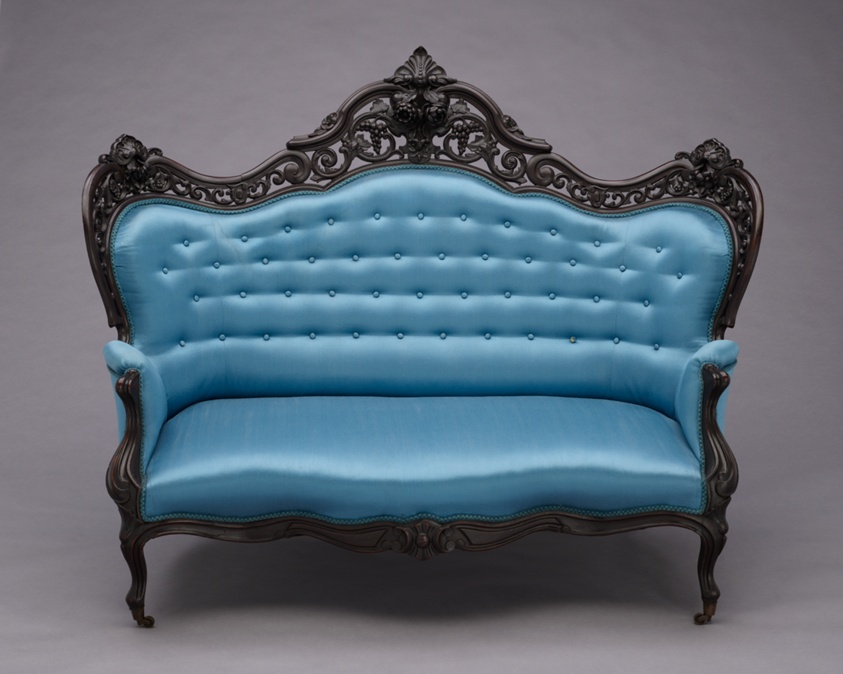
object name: Furniture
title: Sofa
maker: John and Joseph W. Meeks Company; American, active 1836–59; New York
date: 1856–65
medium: Rosewood and upholstery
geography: New York City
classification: seating; furniture; american decorative arts; american arts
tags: furniture